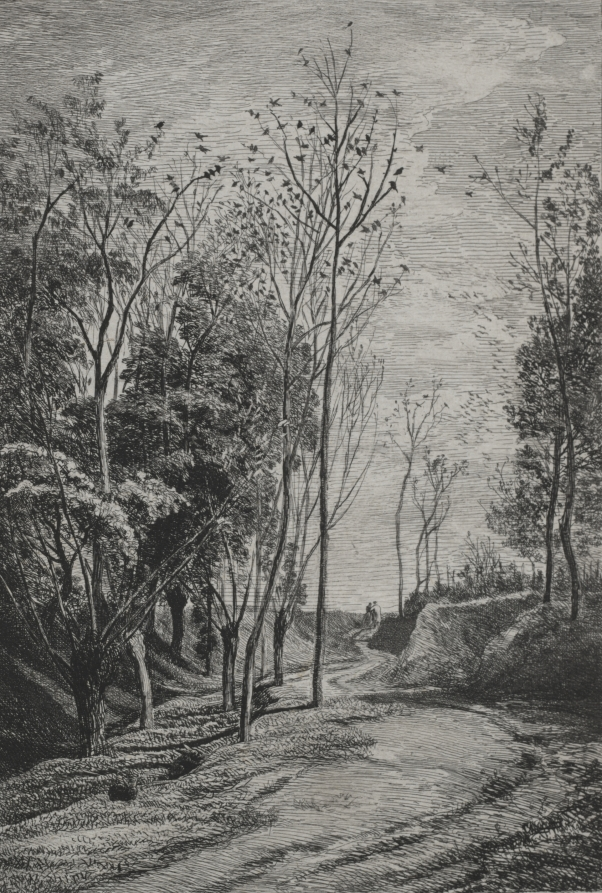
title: The Little Brids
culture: France, 19th century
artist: Charles François Daubigny (French, 1817–1878)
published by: Auguste Delâtre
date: 1850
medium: etching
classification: Print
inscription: signed, lower left, in plate: Daubigny; lower right, in plate: Imp. Aug. Delâtre, Faubourg Poissonnière 145; lower center, in plate: petits oiseaux le printemps...oiseaux chantez le printemps et l'amour